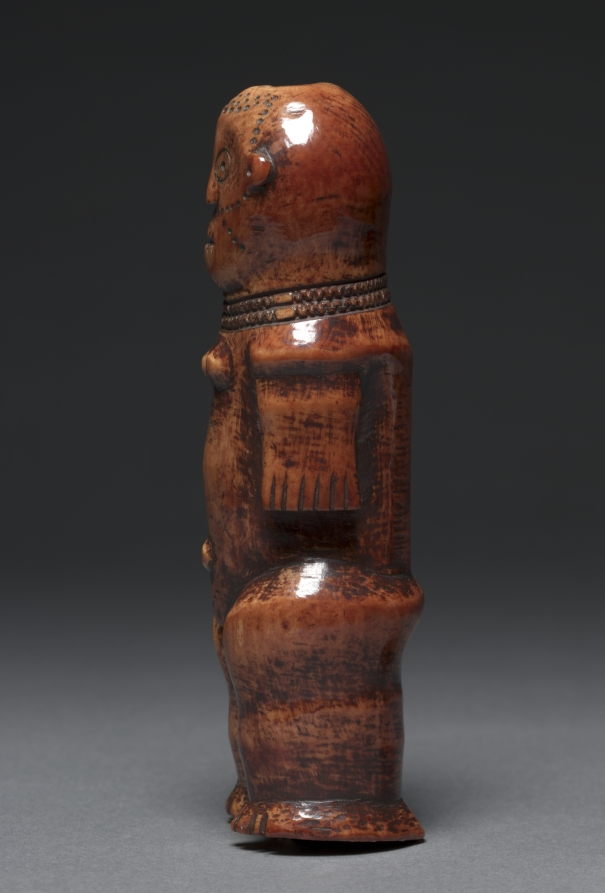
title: Figure (iginga)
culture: Africa, Central Africa, Democratic Republic of Congo, Lega-style maker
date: probably 1800s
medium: Elephant ivory, tukula, and oil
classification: Sculpture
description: The life of Lega men and women is structured around their advancement through the different grades of the Bwami association. Fulfilling political, social, religious, and other roles, the members’ ultimate purpose is the pursuit of wisdom and excellence. Ivory figurines were reserved for members of the two highest Bwami grades, in which the core of the Lega’s moral philosophy is revealed.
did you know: The dark surface (patina) of this sculpture comes from years of handling and the application of oil and a red powder called tukula; it was originally cream-colored!